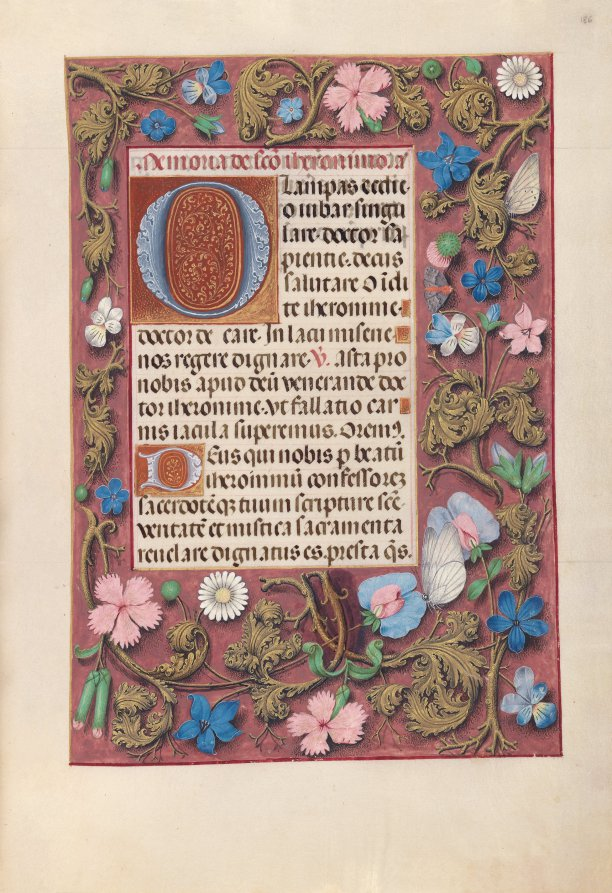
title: Hours of Queen Isabella the Catholic, Queen of Spain: Fol. 186r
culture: Flanders, Ghent and Bruges, late 15th century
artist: Master of the First Prayerbook of Maximillian (Flemish, c. 1444–1519)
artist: and Associates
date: c. 1500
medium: ink, tempera, and gold on vellum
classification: Bound Volume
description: This manuscript was illuminated by a circle of at least five highly organized manuscript painters active in the Flemish cities of Ghent and Bruges. The principal illuminator was Alexander Bening, who painted the majority of the book's miniatures. Manuscripts produced by this circle of artists are renowned for the decoration of their borders, which typically feature a rich variety of realistically-painted flowers, birds, and butterflies. This prayer book, called a book of hours, was intended not for a cleric, but for the private devotions of a lay person-in this case, Isabella the Catholic, Queen of Spain (1451-1504). Isabella's coat of arms embellishes the book's frontispiece. It is unlikely that the book was commissioned by the Queen herself; rather, she probably received it as a diplomatic gift from someone courting her patronage, perhaps Cardinal Francisco Jimenez de Cisneros. A Franciscan friar, Jimenez was dependent upon Isabella for his advancement, first to the post of Queen's confessor in 1492, and then to Archbishop of Toledo in 1495.